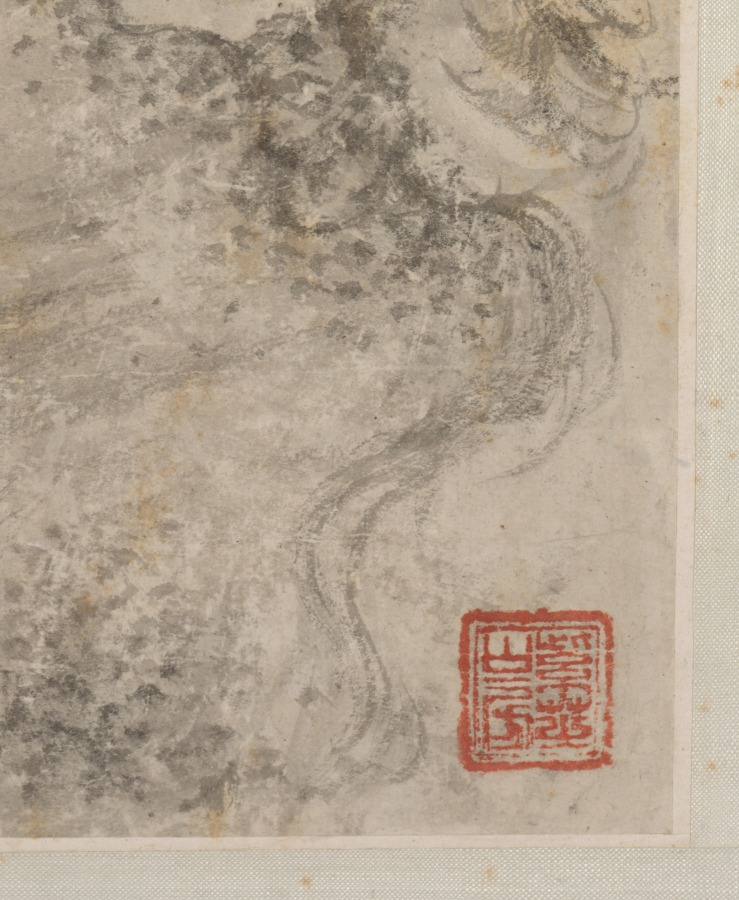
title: Landscape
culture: China, Qing dynasty (1644-1911)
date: 1644–1911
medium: hanging scroll, ink and slight color on paper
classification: Painting